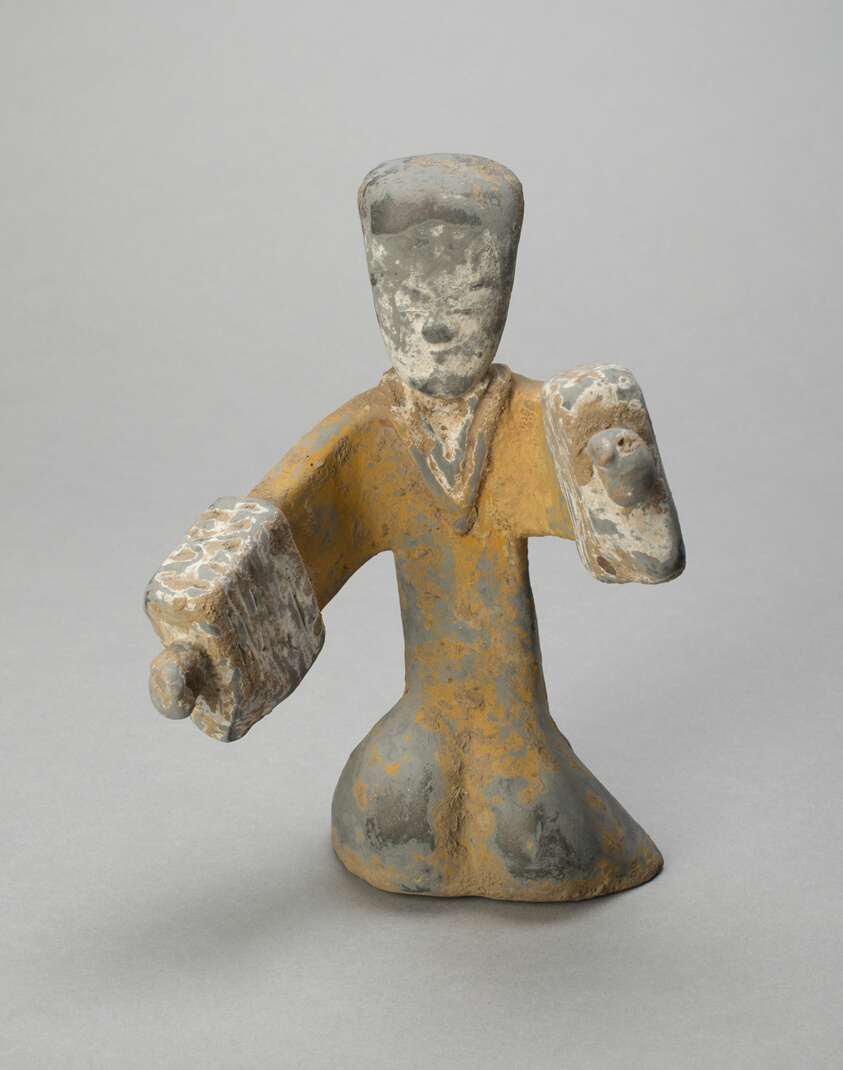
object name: Sculpture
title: Female Dancer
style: Chinese (culture or style)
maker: China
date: Western Han dynasty (206 BCE–9 CE), about 2nd century BCE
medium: Gray earthenware with slip coating and polychrome pigments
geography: China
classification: earthenware; sculpture; ceramics; asian art